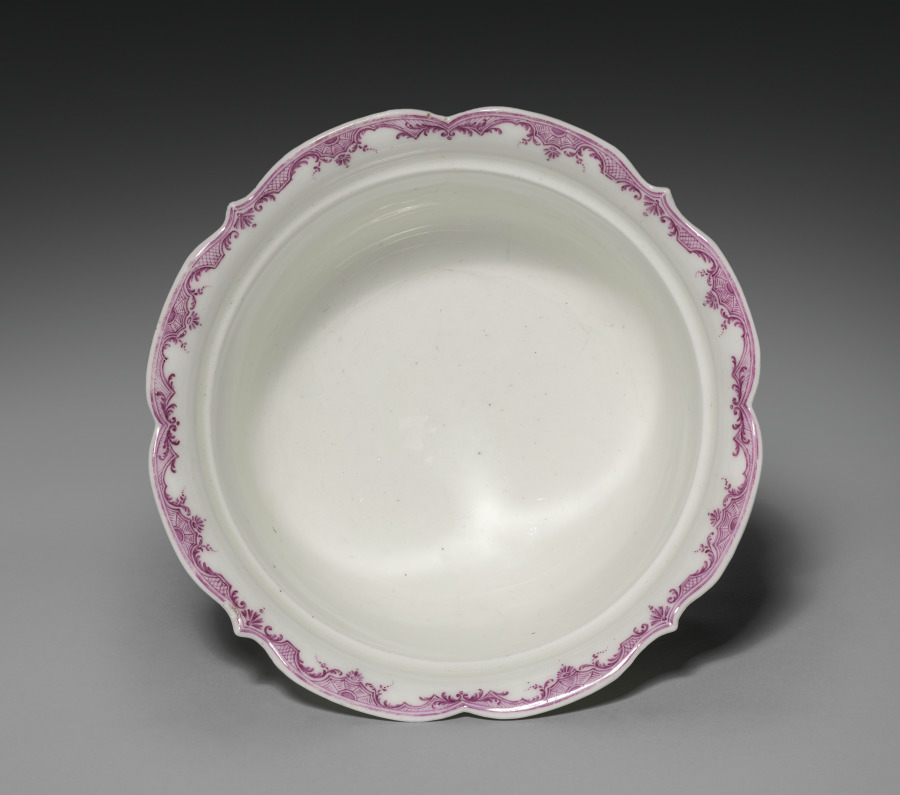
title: Sugar Bowl (Sucrier)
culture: France, Vincennes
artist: Sèvres Porcelain Factory (French, est. 1756)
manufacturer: Vincennes Porcelain Factory (France, 1740–56)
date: 1745–48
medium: soft-paste porcelain with enamel decoration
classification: Ceramic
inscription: in red: P.M.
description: This covered bowl is one of the earliest surviving examples of Vincennes porcelain. Its decorations, particularly the lacy borders, show the influence of Meissen porcelain, but an individual note is struck in the extreme delicacy and colorful restraint of the painting of the landscape scenes.